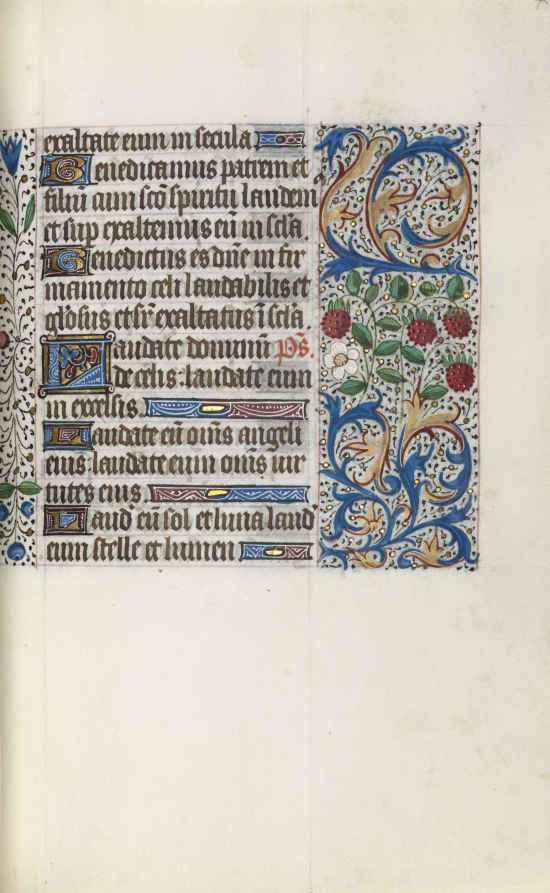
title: Book of Hours (Use of Rouen): fol. 44r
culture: France, Rouen, 15th century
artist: Master of the Geneva Latini (French, active Rouen, 1460–80)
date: c. 1470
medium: ink, tempera, and gold on vellum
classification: Bound Volume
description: In the late 1400s and early 1500s Rouen was an established and important center of book production. The city’s cathedral had a wealthy chapter that spent large sums of money to commission books and to maintain its extensive library. The stationers and booksellers would have likely been concentrated in or near the cathedral precinct. This artist, named after a manuscript now in Geneva, was Rouen’s principal illuminator during the second half of the 1400s.